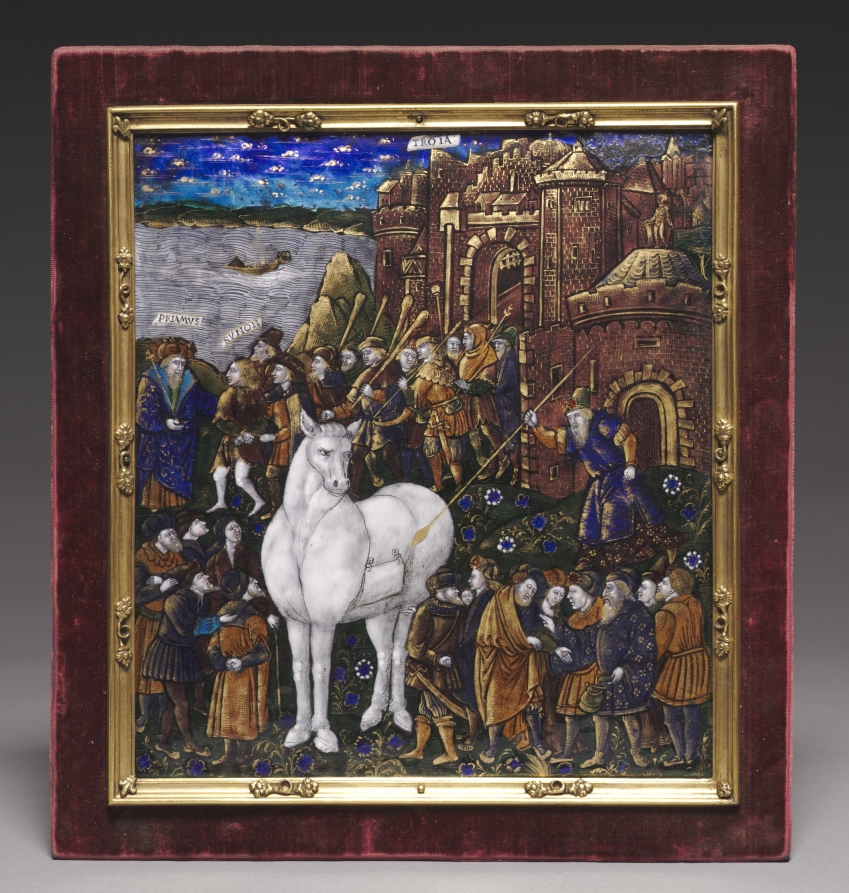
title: Plaque Depicting the Trojan Horse from the Aeneid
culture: France, Limoges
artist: Master of the Aeneid Series (French)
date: c. 1530–40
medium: painted enamel on copper, gilt-silver frame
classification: Enamel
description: This plaque is among the earliest examples of the technique of enamel on copper used during the Renaissance to depict secular scenes. Although it illustrates a passage from the ancient text of the Aeneid, the architecture and dress are more reflective of the courtly style popular in 16th-century France, when this work was made.